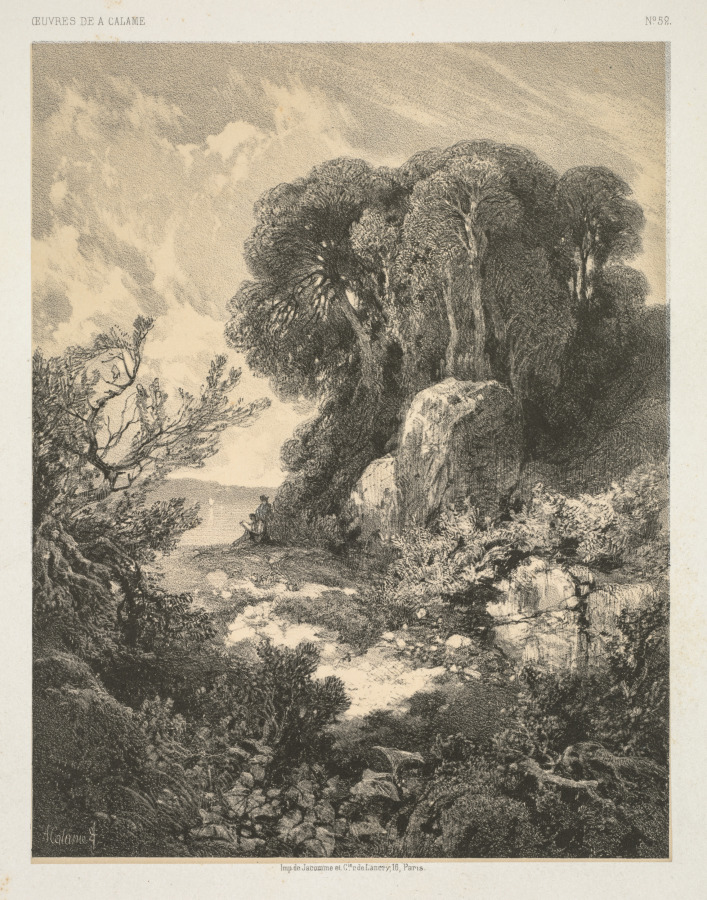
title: Oeuvres de A. Calame: No. 52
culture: Switzerland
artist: Alexandre Calame (Swiss, 1810–1864)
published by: F. Delarue, r. J.J. Rouseau, 18, Paris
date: c. 1850–60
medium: color lithograph on chine collé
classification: Print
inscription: On plate; upper left corner: Oeuvre de A. Calame.; upper right: No. 52; below image center: Imp.lith.de Jacomme & Cie. R. de Lancry, 16.; below image left: Esquisse peinte., below image right: F. Delarue. Edit.r.JJ.Rousseau. 18.Paris